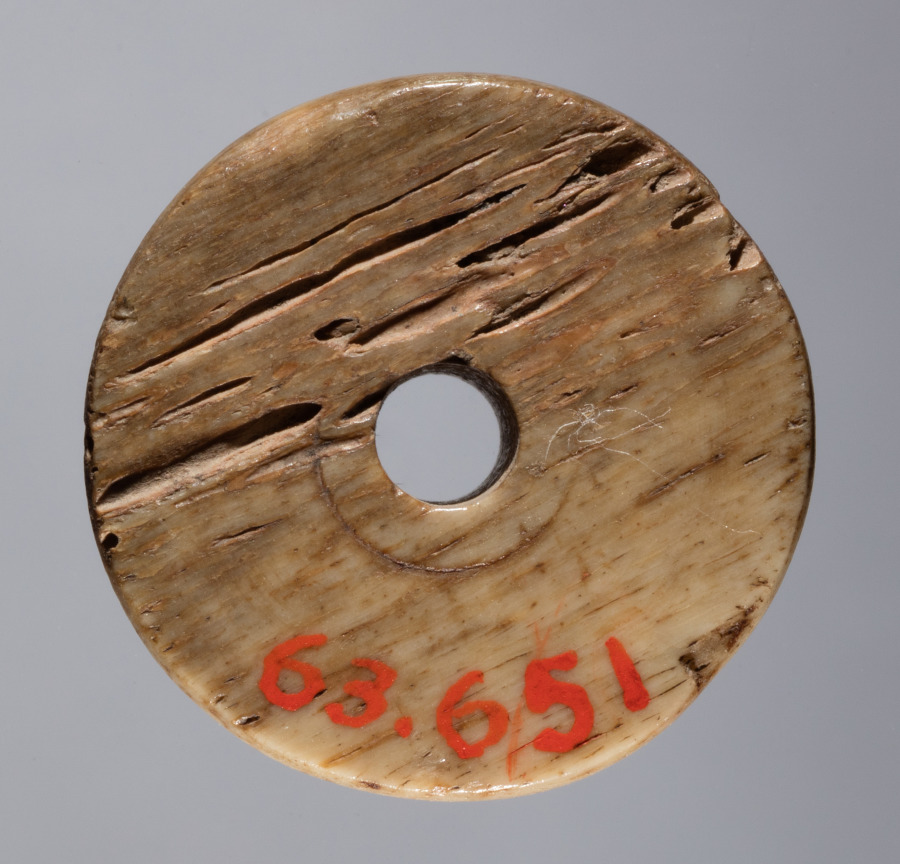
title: Spindle Whorl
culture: Iran, early Islamic period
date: 700s - 900s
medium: bone, incised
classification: Spindle Whorl